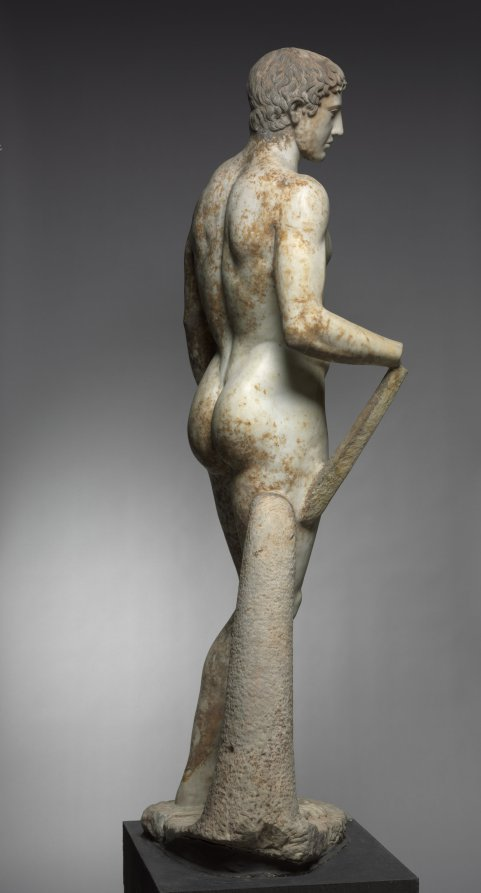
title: Statue of an Athlete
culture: Italy, Roman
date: 1–100 CE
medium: marble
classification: Sculpture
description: This idealized athlete recalls Greek sculptural types invented and popularized during the 400s BC. Large-scale athletes and other sculptures like this were originally created by famous artists as sanctuary dedications. Centuries later, they were widely copied and adapted by Roman sculptors, whose clients sought their own versions of earlier masterpieces. Working in marble rather than bronze, these sculptors added certain elements for stability, such as the struts and the large tree trunk beside the right leg here. Sculptures like this one are profoundly complex, made by and for Romans but descended from Greek ancestors.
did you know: For many years, this sculpture stood in the rotunda of the Cleveland Museum of Art.